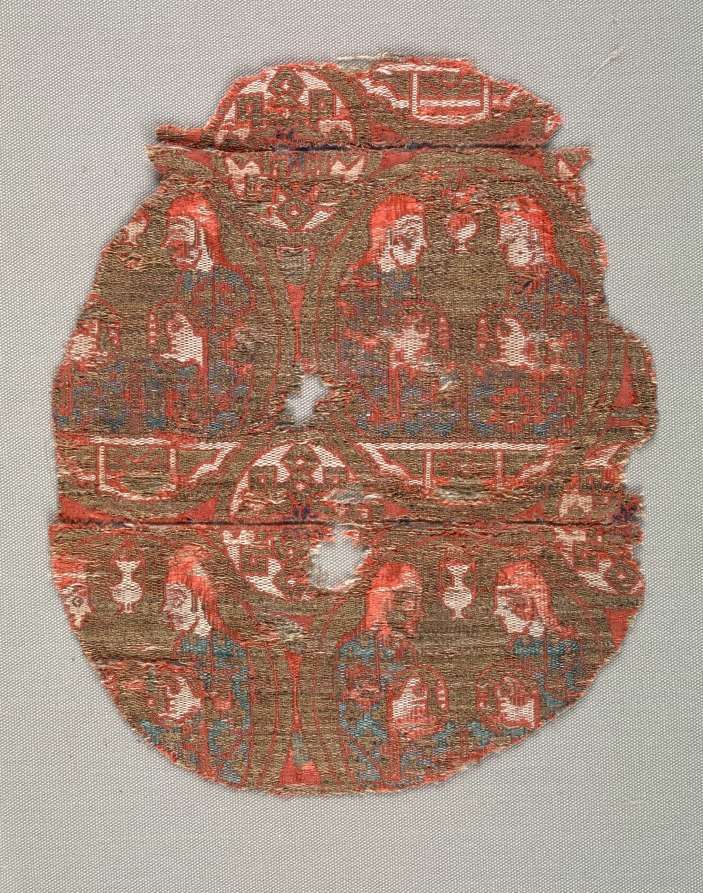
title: Fragment with musicians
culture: Spain, probably Almeria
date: 1200s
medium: Silk and gold thread: lampas weave with areas of double cloth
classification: Textile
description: The repeating pattern features female musicians playing tambourines. They wear long blue and blue-green robes in alternate rows. A lamp hangs between them, suggesting an evening setting. Traces of their black hair peek out from under red headdresses. This textile, along with several other fragments, was found within the pages of a Christian manuscript in the Cathedral of Vich, near Barcelona in northeastern Spain.